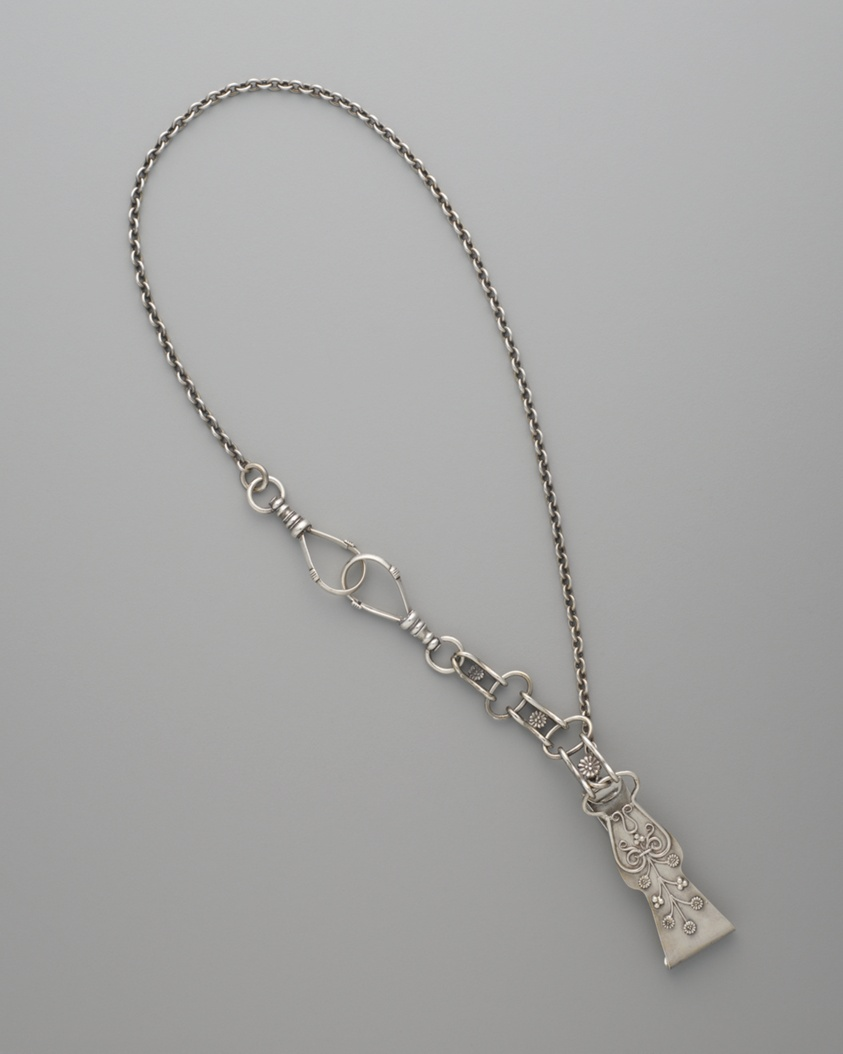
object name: Costume and Accessories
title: Chatelaine Hook and Chain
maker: Tiffany and Company (American, founded 1837); New York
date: 1870–74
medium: Silver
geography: New York City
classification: costume accessory worn at waist or below; chatelaine; silver; american decorative arts; american arts; decorative arts